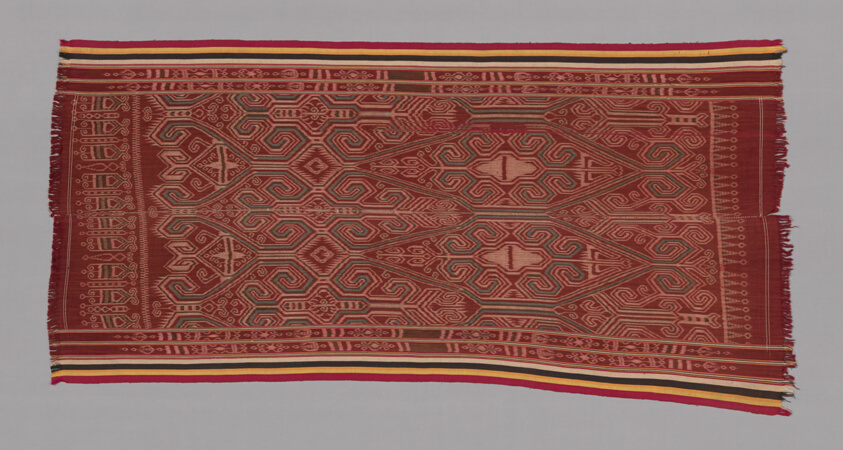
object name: Textile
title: Ikat-dyed Blanket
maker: Iban (Malaysia, Sarawak or Borneo)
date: 1875/1900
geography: Malaysia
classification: textile; weaving